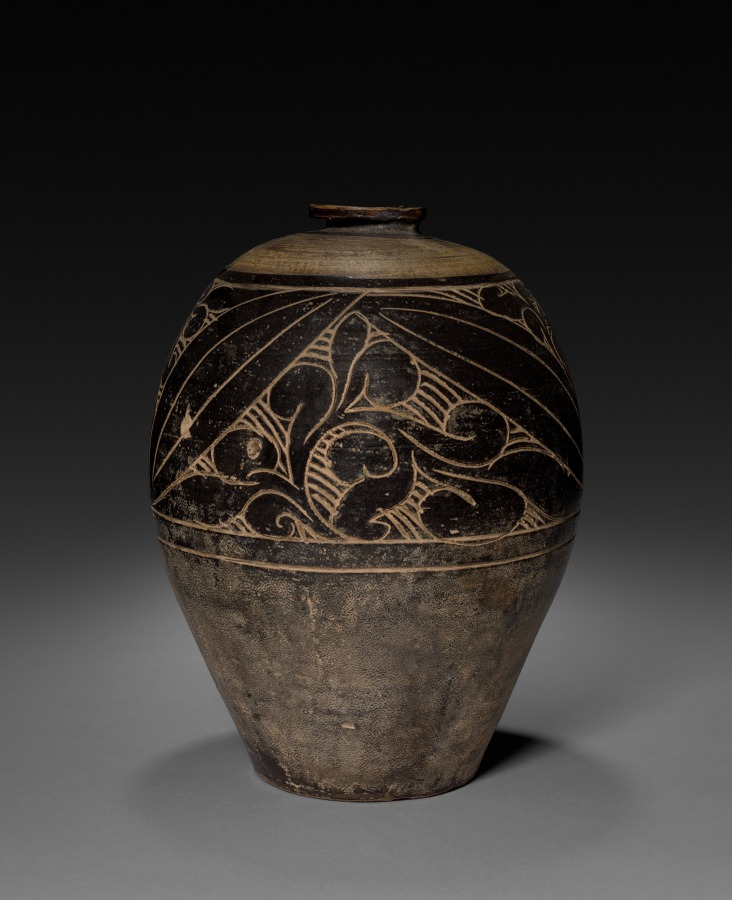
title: Jar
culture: China, Yuan dynasty (1271-1368)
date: 1271–1368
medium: glazed grayish-buff stoneware with incised decoration and underglaze slip application, Cizhou ware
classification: Ceramic